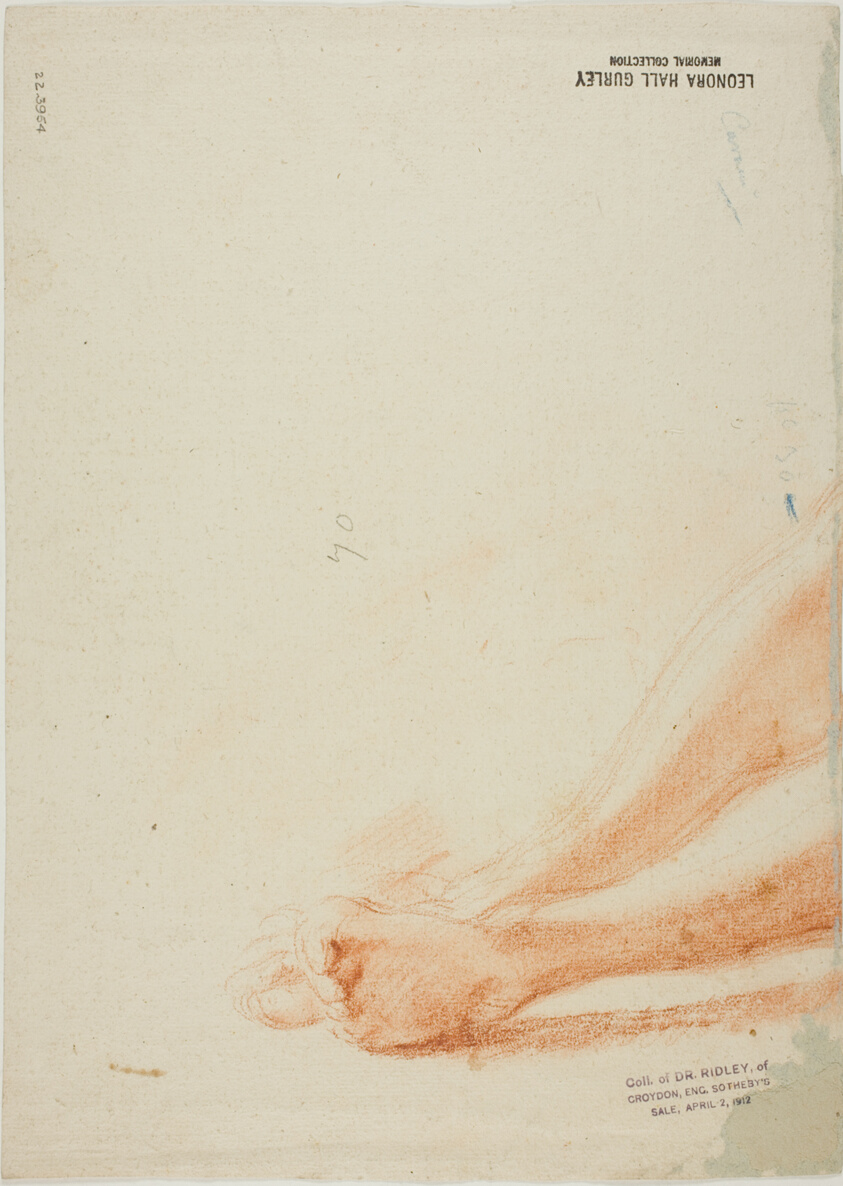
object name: Drawing and Watercolor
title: Two Cloud-Borne Nude Female Figures (recto); Fragment of Reclining Figure (verso)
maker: Attributed to Carlo Cignani; Italian, 1628-1719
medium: Red chalk, with traces of graphite (recto), and red chalk (verso), on ivory laid paper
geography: Italy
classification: drawings (visual works); prints and drawing